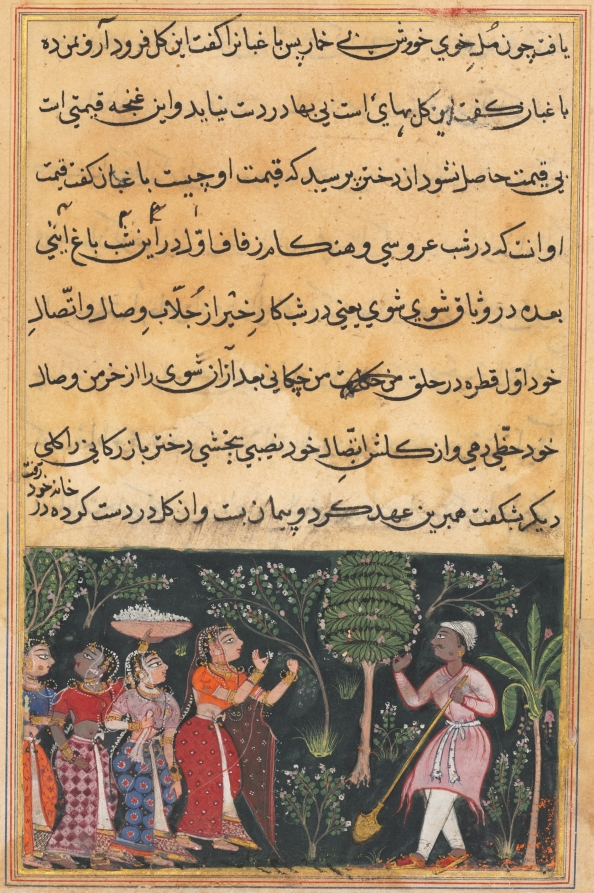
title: The daughter of the merchant of Mazanderan asks the gardener for the rose, from a Tuti-nama (Tales of a Parrot): Twelfth Night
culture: Mughal India, court of Akbar (reigned 1556–1605)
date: c. 1560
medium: gum tempera, ink, and gold on paper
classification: Painting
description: Persian books are read from right to left. One artist illustrated the three scenes from one of the 52 stories of the Tuti-nama, retaining many pre-Mughal traits. Trees stand out as bold shapes, and figures are arranged in a single register, or horizontal spatial band, and have angular and expressive gestures. The figures of the women are closely related to pre-Mughal types, shown always in profile and wearing garments that stand stiffly and sharply out before them. In leaves from the Tuti-nama, Mughal artists adapted the colors, compositions, and figure types of the earlier style.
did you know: This page was painted by the same anonymous artist who painted folios 99v (1962.279.99.b) and 100v (1962.279.100.b).